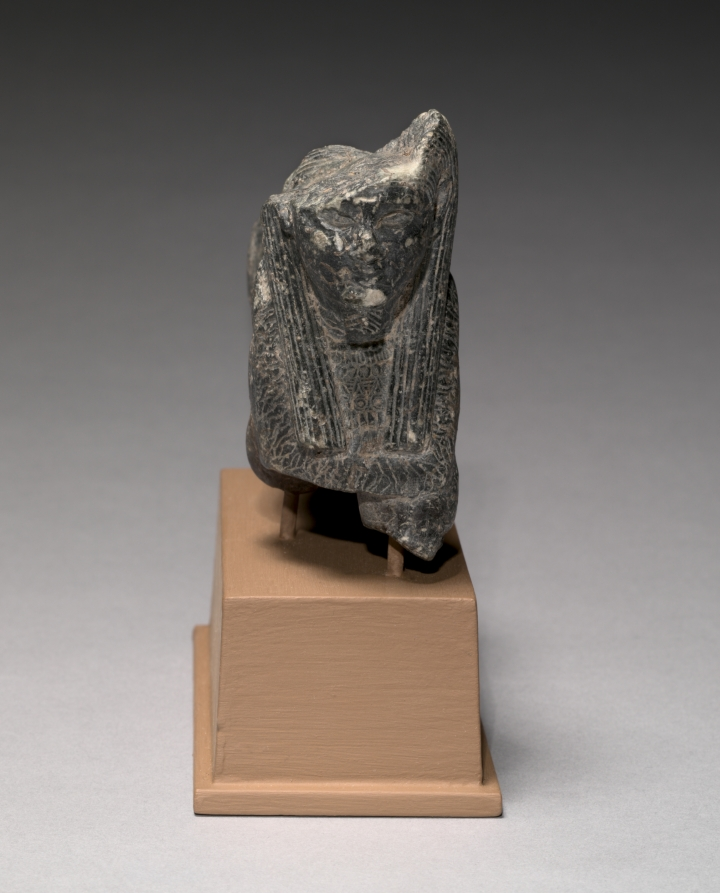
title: Tutu as Sphinx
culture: Egypt, Greco-Roman period (332 BCE–395 CE), Ptolemaic dynasty (305–30 BCE)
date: 150 BCE–30 CE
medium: gray steatite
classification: Sculpture